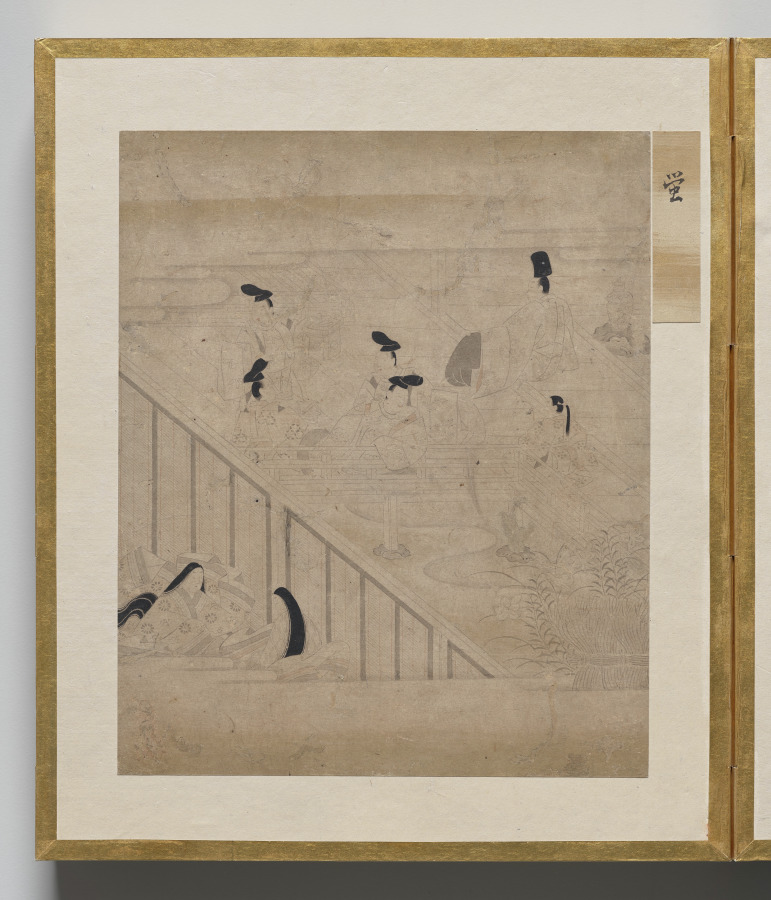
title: Fireflies from Album of Illustrations for the Tale of Genji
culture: Japan, Edo period (1615–1868)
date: 1600s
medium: painting in an accordion-style album; ink, light color, and gold on paper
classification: Bound Volume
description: This album contains illustrations for the classic literary work the Tale of Genji, authored in the 1000s by Murasaki Shikibu, an aristocrat of the Heian period (794–1185) court. The scenes are painted in the “white drawing” (hakubyō) mode, in which a fine ink line is used to depict figures and spaces with great subtlety, punctuated only occasionally by traces of red pigment for a character’s lips, a detail of a garment, or a decorative element. These two scenes illustrate episodes from the chapters “Thin Veil of Cloud” (Usugumo) and “Barrier Gate” (Sekiya).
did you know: The illustrations are identified by chapter title in cartouches to the upper right of the paintings.